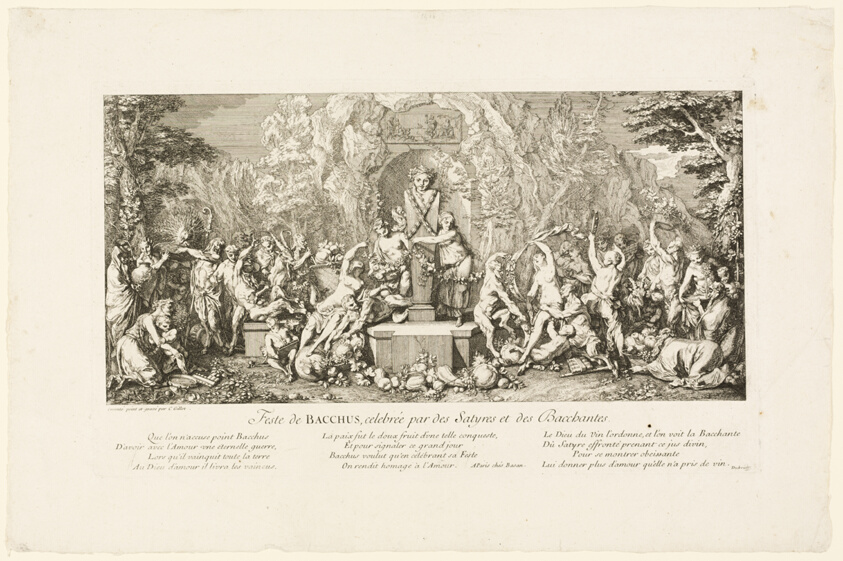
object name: Print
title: Festival of Bacchus Celebrated by Satyrs and Bacchantes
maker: Claude Gillot (French, 1673-1722)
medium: Etching on paper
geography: France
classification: etching; print; prints and drawing